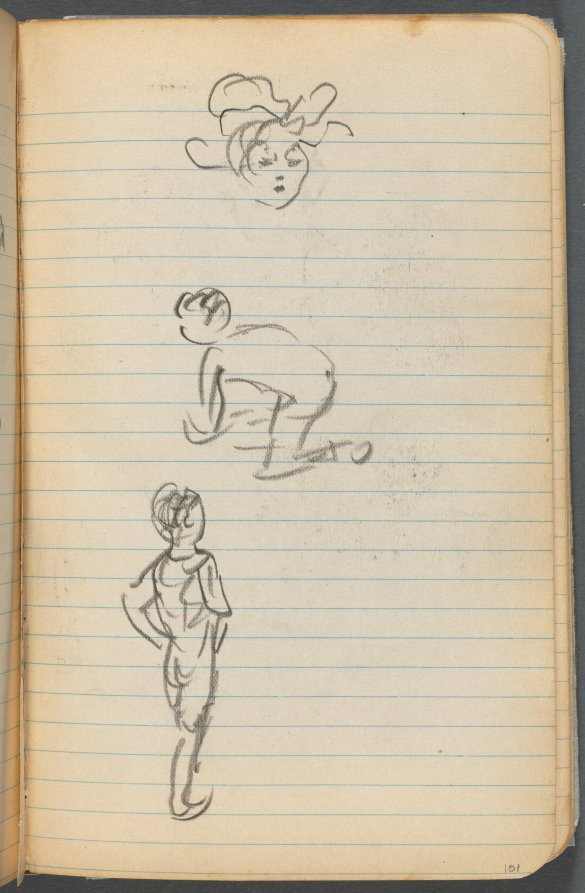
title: Sketchbook, page 101: Three Figures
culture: America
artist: Maurice Prendergast (American, born Newfoundland [now Canada], 1858–1924)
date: 1905–10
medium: graphite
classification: Bound Volume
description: This sketchbook contains 69 pages of drawings, a diary largely devoted to the state of the artist's health, and a three-page discourse on the nature of genius and ideas.